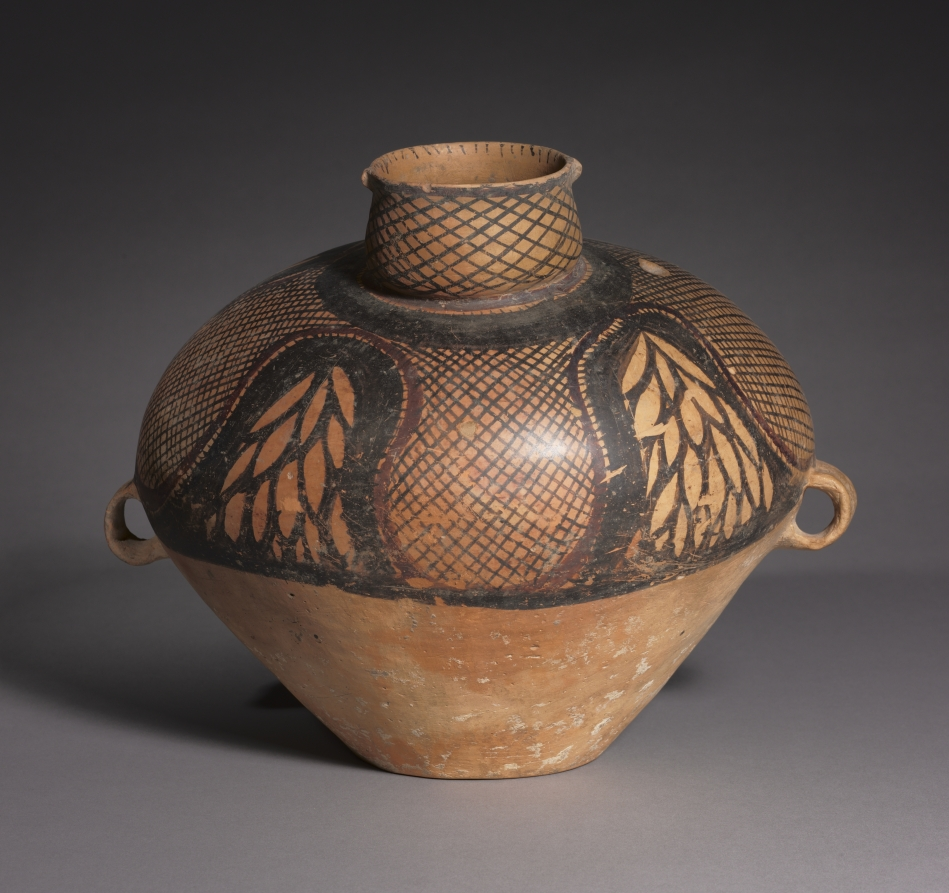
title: Bird-shaped Urn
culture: Northwest China, Neolithic period, Majiayao culture, Banshan phase (2650–2350 BCE)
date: 2650–2350 BCE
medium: earthenware with slip-painted decoration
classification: Ceramic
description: An imaginative shape and abstract curvilinear patterns lend delightful charm to this functional jar. Its fine-grained body has a light reddish color due to the iron content in the clay, achieved by ensuring abundant air in the kiln during the firing. The surfaces were burnished before applying the painted decoration in black and red.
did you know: This abstract vessel may be imagined as a bird with feathers painted on the body.